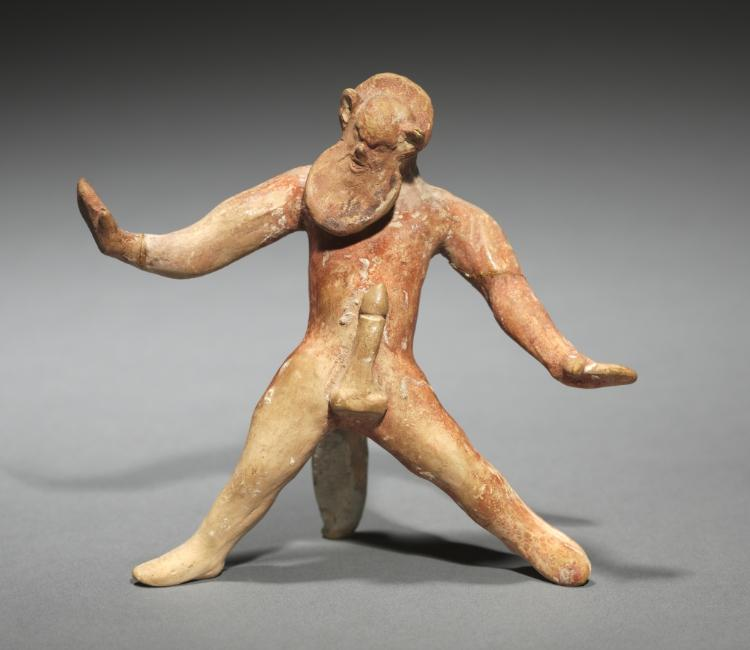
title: Dancing Satyr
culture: Greece, Boeotia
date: 500–475 BCE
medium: painted terracotta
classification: Sculpture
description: Part man and part beast, satyrs were mythical woodland creatures. In art, they were depicted with the ears and tail of a goat or horse, sometimes with hooves, and in a high state of sexual arousal. Satyrs often accompanied Dionysus, the god of wine, in his drinking bouts and other escapades. These three probably once decorated the rim of a large punch-bowl–shaped vessel for serving wine.